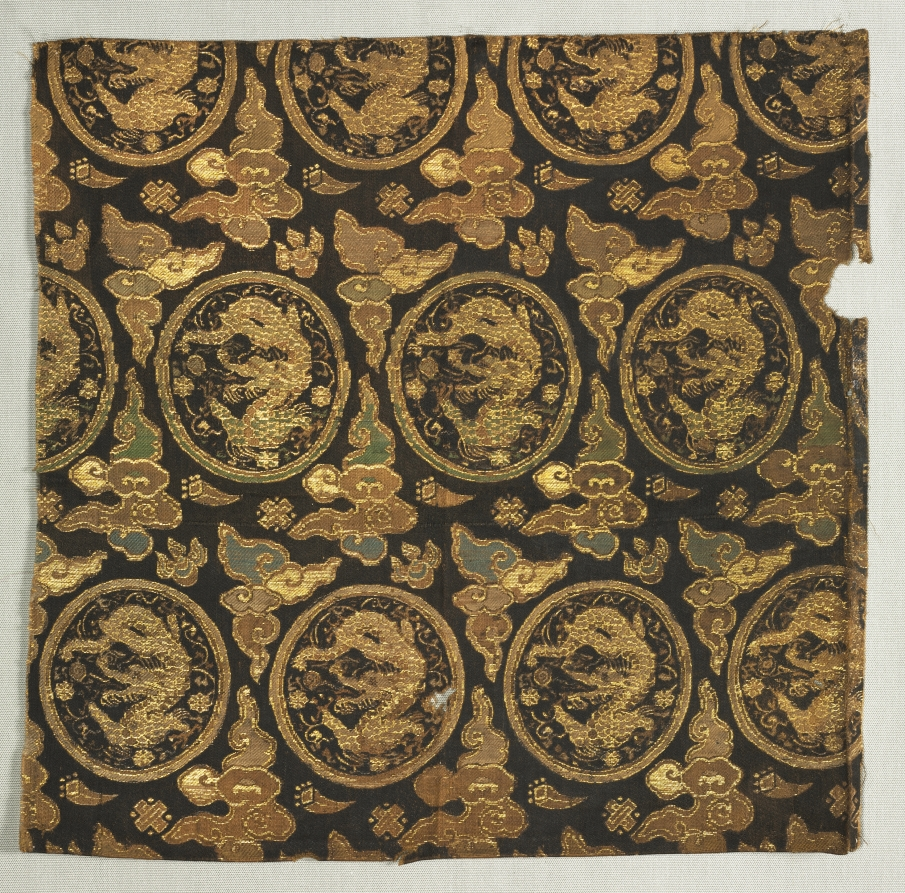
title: Silk Textile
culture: Japan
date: 1700s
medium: silk, metallic thread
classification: Textile